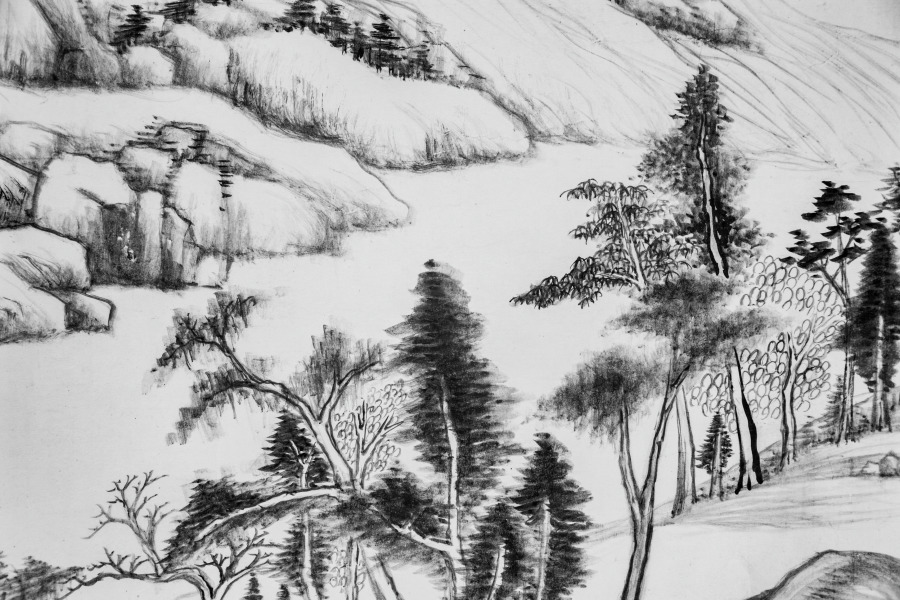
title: River and Mountains on a Clear Autumn Day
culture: China, Ming dynasty (1368–1644)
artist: Dong Qichang (Chinese, 1555–1636)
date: c. 1624–27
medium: Handscroll; ink on Korean paper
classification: Painting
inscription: 黃子久江山秋霽似此，當恨古人不見我也。思翁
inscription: 董文敏每遇高麗鏡面箋，書畫尤為入神。此卷改表紙用之，字跡隱然，兼有朝鮮之印。至於筆法圓秀，真接倪黃。豈文沈所可同日而語也。 康熙庚午中秋後一日，天氣澄爽，重裝初畢，跋於瓶廬。抱瓮翁高士奇。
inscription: Second inscription by Gao Shiqi 高士奇 (1645–1704): On the twenty-third day of the ninth month, the jiaxu year of the Kangxi era [1694], I packed my bags to head north. When my boat passed Wuchang [Suzhou], Mr. Mantang [Song Luo] brought wine to bid me farewell so that we could share our thoughts on our separation in the last few years. I showed him the paintings and calligraphy which I collected and asked his opinions. Since Mr. Mantang does not own any handscrolls by Wenmin [Dong Qichang], I leave this one for him in commemoration of our parting; thus the painting will have a worthy owner and our meeting will become a beautiful story in the future. It is the fourth day after the beginning of winter, with the sky clear and sober. Trees under frost have turned red and yellow, seemingly echoing the brush and ink in the painting. I also ask Mr. Mantang to inscribe a poem to commemorate our meeting so that it will survive forever.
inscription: 1 colophon and 4 seals of Song Luo 宋犖 (1634–1713): Who is the foremost art connoisseur of our dynasty?/ Tangcun [Liang Qingbiao, 1620–1691] is dead, so the title passes to Jiangcun [Gao Shiqi]./ Leaving office, you retired for five years in the Lake region./ Fondling handscrolls and hanging scrolls from morning to evening./ You sent me your collection catalogue Xiao Xia Lu last year;/ It is indeed the true equal of [Zhou Mi's] Yun Yan Guo Yan./ This year you returned to the capital by imperial order;/ Your boat with calligraphy and paintings anchored at the river bank in Suzhou./ When we met each other you did not waste any time for conversation by poured out immediately/ From your "coral net" extraordinary treasures./ You produced incomparable scrolls, with gold-inscribed labels and jade rollers,/ Pouring out from bags and trunks, they were spread in disarray./ Without a word, I rolled and unrolled until my fingers were numbed,/ We sat straight, facing each other quietly, and never felt tired./ For three days we forgot about sleeping and food./ And at times we shouted our joy out loud, forgetting who is host or guest./ Your Dwelling in the Fuchun Mountains and the Yuansheng manuscript/ These peerless works I myself examined with delight./ As an added pleasure to the farewell dinner under the Maple Bridge,/ You allowed me to hold again this handscroll by Dong Qichang--/ The Misty River and Piled Peaks [by Zhao Mengfu] and this Clear Autumn Day are two extraordinary masterpieces./ In showing such life and spirit with "qi yun." the artists were truly "men of heaven."/ The Clear Autumn Day is not even three feet long,/ Painted on tributary Korean paper, it shines like silver./ Every building up and every turn of the mountains imitates nature,/ Every tree and every rock is removed from the commonplace./ From the beginning, the theory of poetry is the theory of painting,/ Like the lotus and the morning sunshine, they complement and refresh each other./ The artist's inscription regrets that "the Old Masters cannot see my scroll."/ Huang Gongwang would have agreed in his grave./ The vermilion of the seals glitter and dazzles the eyes,/ These added accessories are as valuable as jade./ You are very kind to give it to me,/ The feelings expressed in your inscription are so sincere./ Wanting to refuse, but unable, I accept it to respect your wish,/ And taking off my gown and cap I wrapped it with care./ You asked me to write a long poem in commemoration of this beautiful occasion,/ I am too ashamed that my effort in response is so poor and inadequate./ Returning home, I unrolled it under candlelight, trying to write the colophon,/ The light of the waning moon shines at the foot of the mossy wall./ Earnestly humming and brows knit in deep thought, I try to compose;/ The verses are not outstanding, but the facts are real./ With this poem recorded at the end of the scroll, I mail it to you for approval,/ This poem and this painting shall outlast a thousand springs. (Translation by LYSL/HK/WKH)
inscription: 1 colophon and 2 seals of Shao Changheng 邵長蘅 (1637–1704); 2 inscriptions and 14 seals of the Qianlong 乾隆 emperor (r. 1736–95); 1 seal of the Jiaqing 嘉慶 emperor (r. 1796–1820); 3 seals of the Xuantong 宣統 emperor (r. 1908–11); 1 seal unidentified.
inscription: [印] 朝鮮國王之印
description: Dong Qichang had a tremendous impact on the artistic practices and historiography of later generations; his works and writings shaped literati aesthetics. Here, Dong places an abstract landscape composition diagonally across the picture plane, configured to recall earlier masters and simultaneously express his own personal style. Dong’s inscription claims, Huang Gongwang’s Autumn Day, looks like this. I truly regret the master has not seen my work. In fact, Dong Qichang may have had Dong Yuan’s Xiao and Xiang Rivers in mind, a work he owned and considered a key work in Chinese art history.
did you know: The painting has an imprint of a Korean seal that reads "Seal of the king of Joseon."